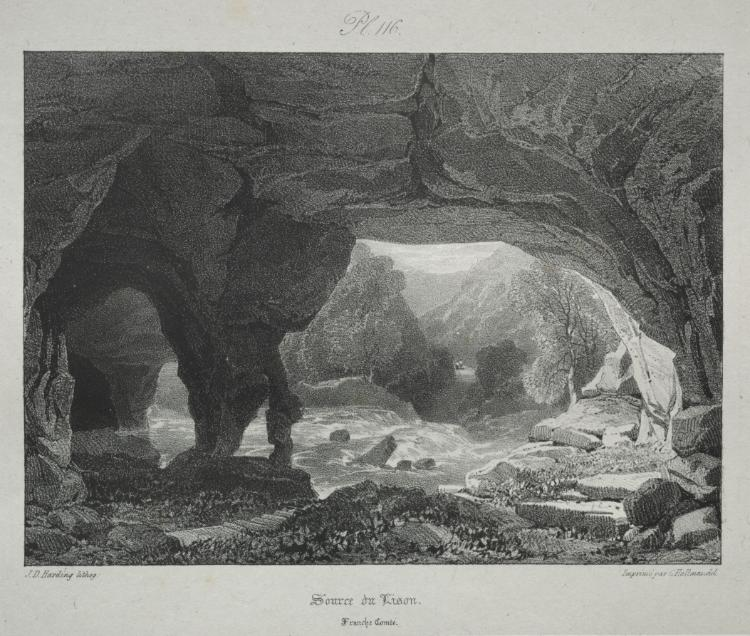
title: Voyages pittoresques et romantiques dans l'ancienne France. Franche-Comté: Source du Lison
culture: England, 19th century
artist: James Duffield Harding (British, 1798–1863)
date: 1825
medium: lithograph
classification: Print